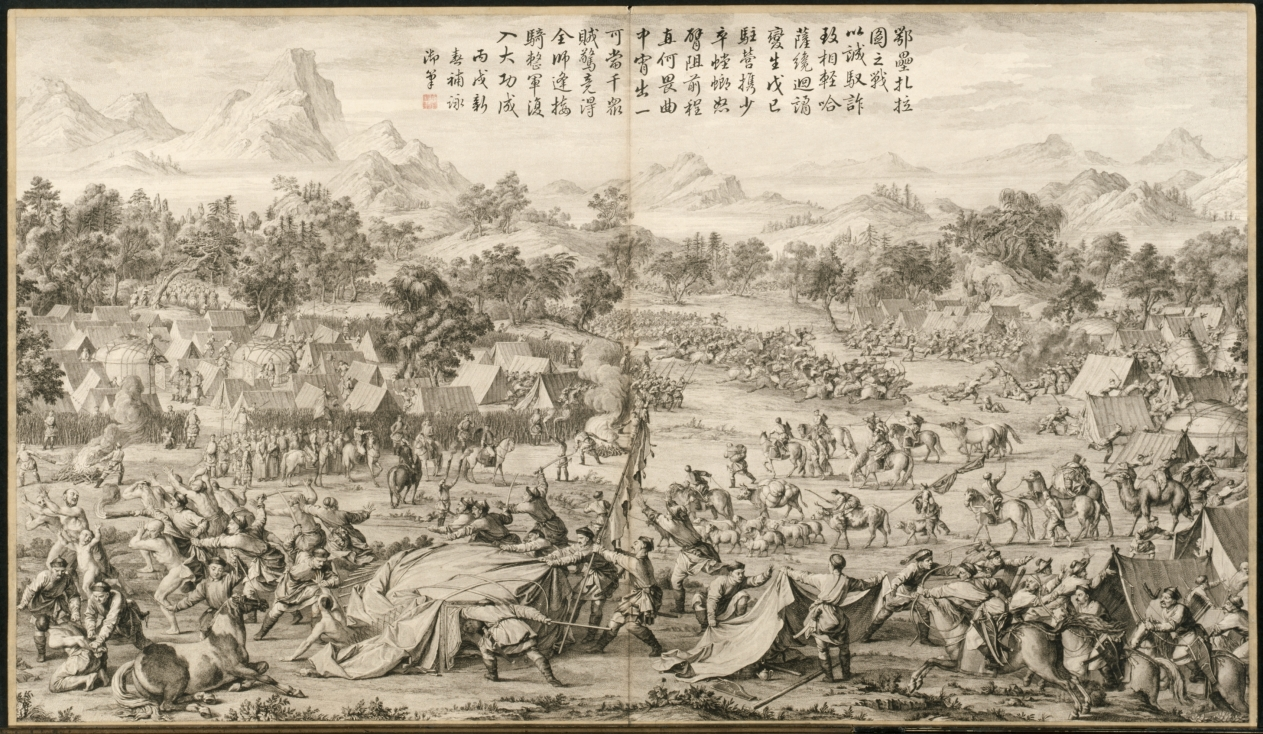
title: The Battle at Elei Zhalatu: from Battle Scenes of the Quelling of Rebellions in the Western Regions, with Imperial Poems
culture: China, Qing dynasty (1644–1911), Qianlong reign (1736–95)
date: c. 1765–74; poem dated 1766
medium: etching, mounted in album form, 16 leaves plus two additional leaves of inscriptions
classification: Print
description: This set of etchings was commissioned by Emperor Qianlong to record in pictorial terms the courage of his generals and soldiers in quelling the rebellions in China's western regions. Qianlong added his own poem to each of the etchings, indicating his appreciation and pride in this demonstration of military might. "Western Regions" refers to the present-day Xingjiang province, often described in Western writing as "Central Asia."